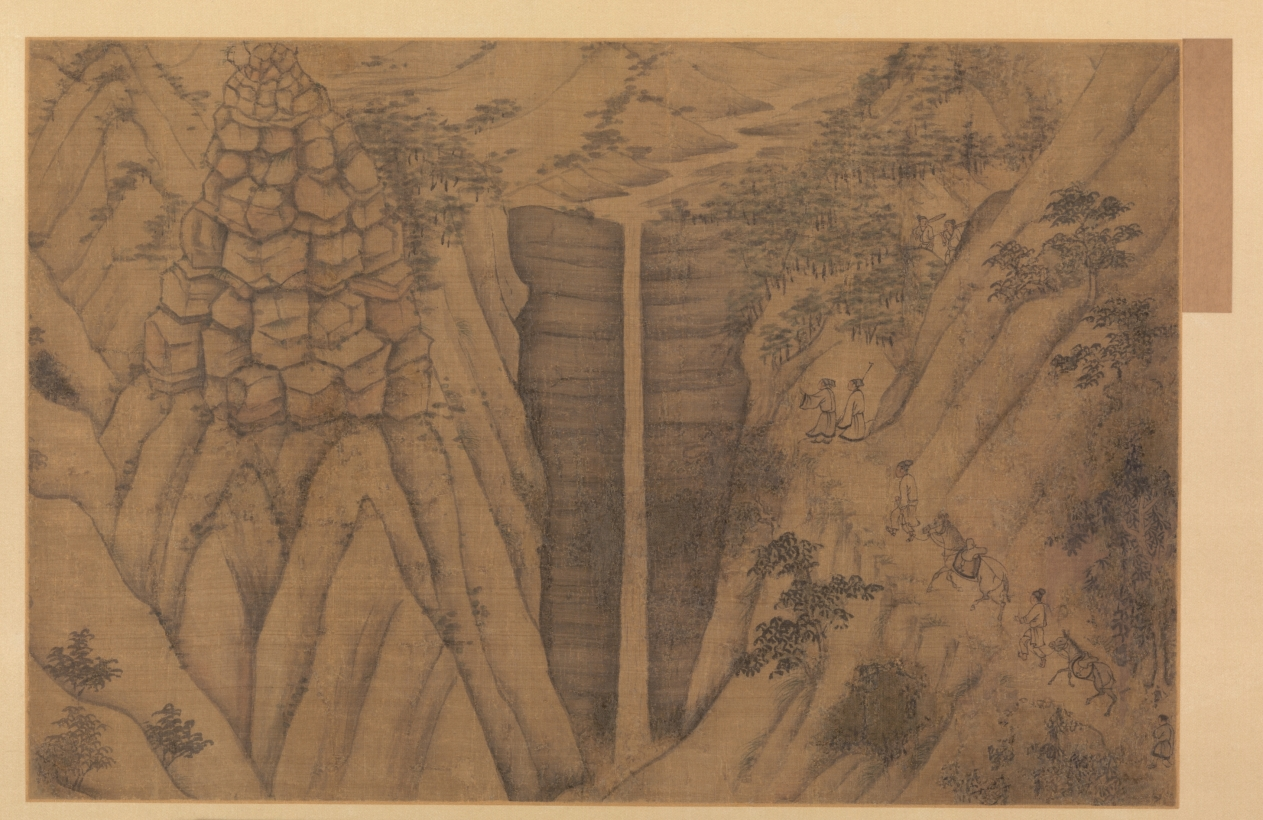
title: Dwelling in the Longmian ("Sleeping Dragon") Mountains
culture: China, Song dynasty (960-1279) - Yuan dynasty (1271-1368)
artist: follower of Li Gonglin (Chinese, c. 1049–1106)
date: 1100s-1200s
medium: handscroll mounted as an album leaf; ink and color on silk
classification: Painting